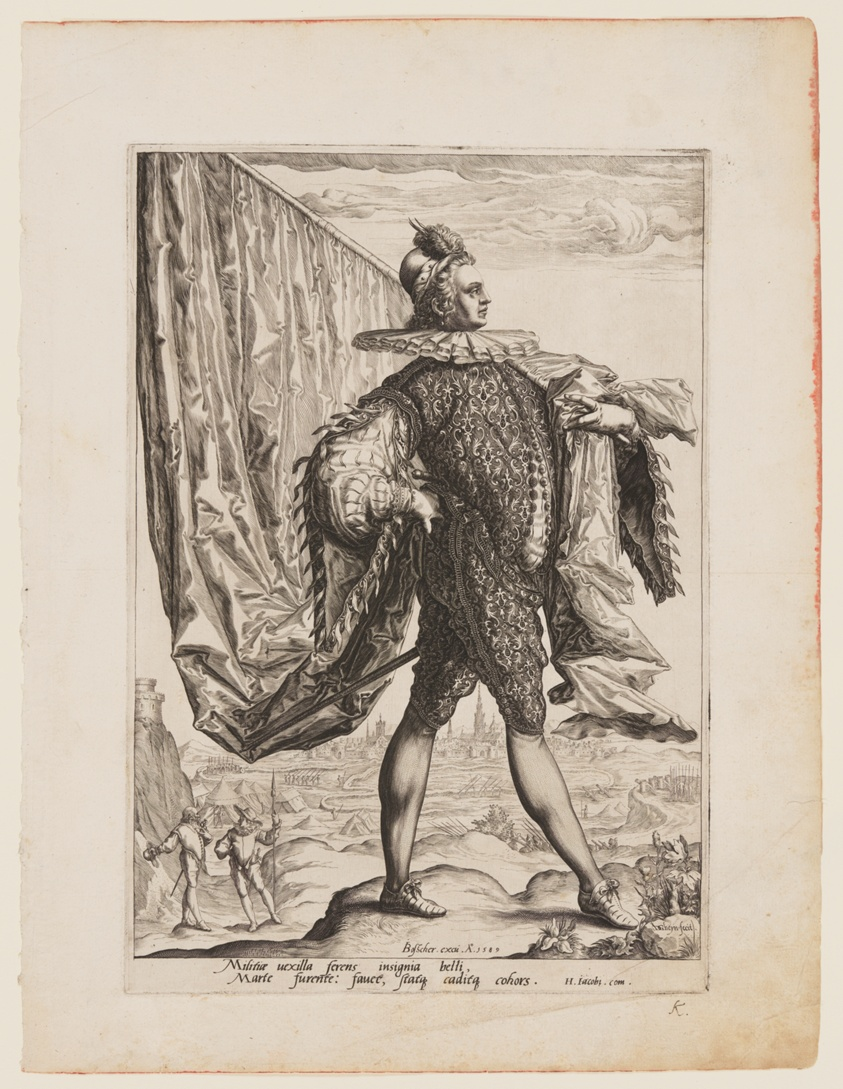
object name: Print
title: Standard Bearer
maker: Jacques de Gheyn II; Dutch, 1565–162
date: 1589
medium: Engraving on ivory laid paper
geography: Netherlands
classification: engraving; paper; print; prints and drawing